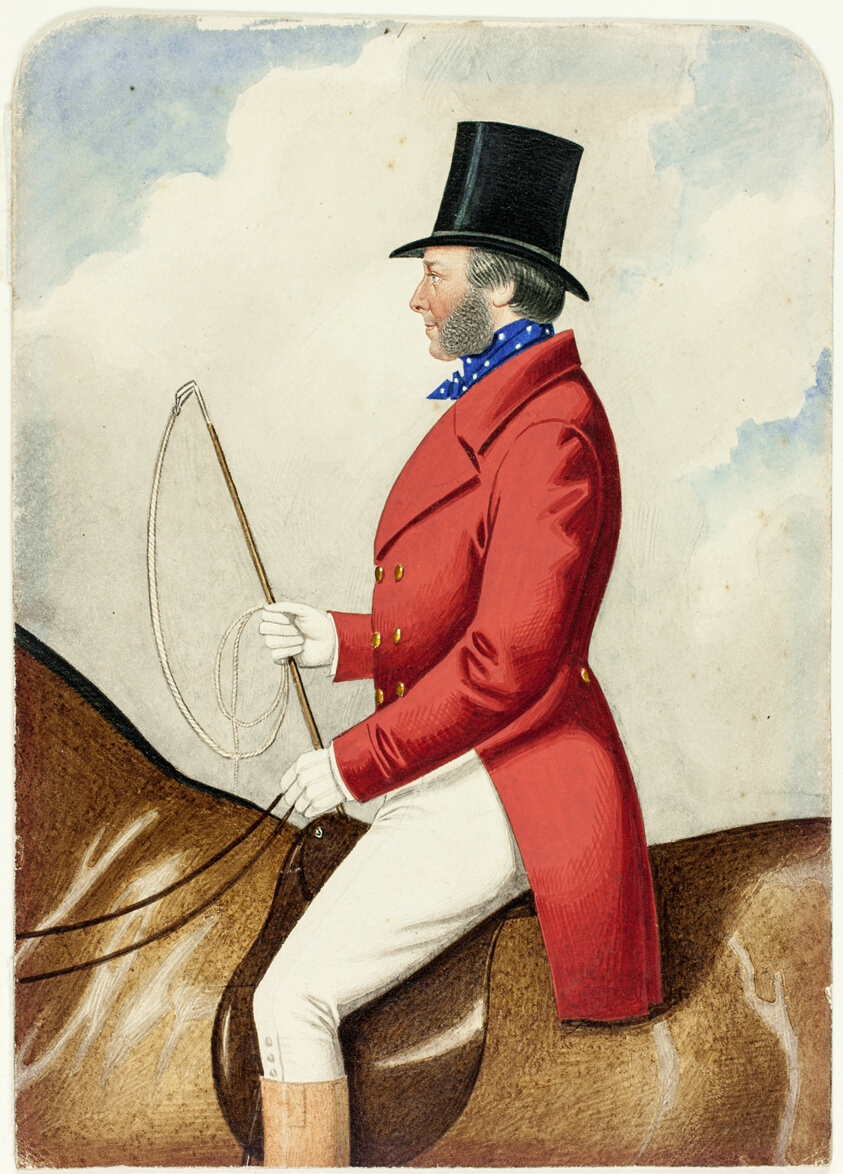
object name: Drawing and Watercolor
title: Equestrian Portrait of Lord Simpson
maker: Joshua Dighton (English, active 1820-1840)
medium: Watercolor and gouache, selectively varnished, on cream wove paper, laid down on gray board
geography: England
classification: watercolor; drawings (visual works); prints and drawing